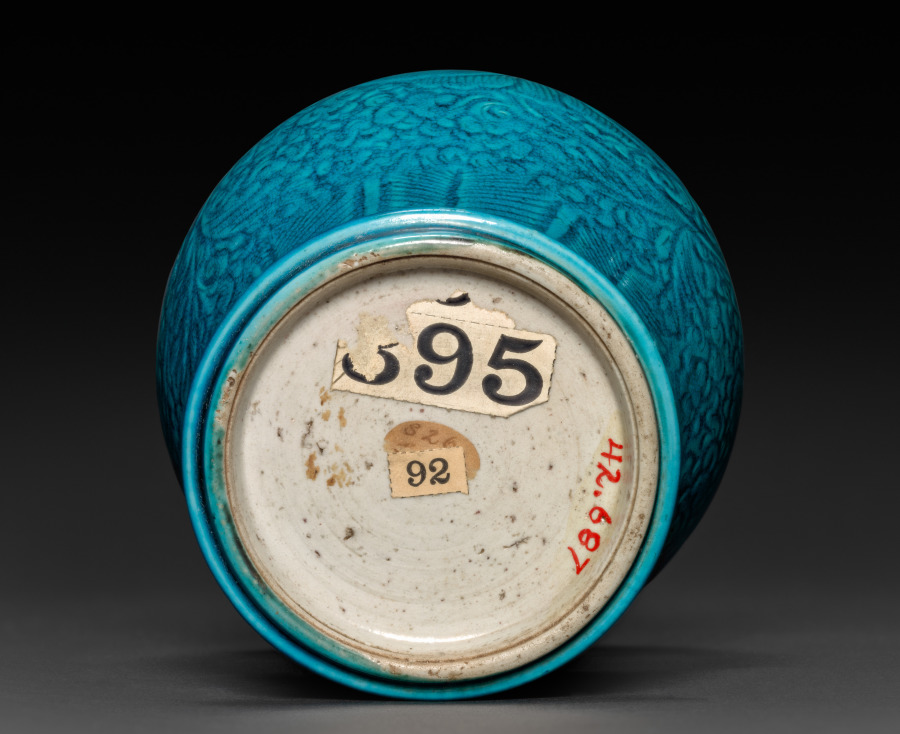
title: Vase with peacock blue glaze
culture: China, Qing dynasty (1644-1911), Kangxi reign (1661-1722)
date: 1662–1722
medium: porcelain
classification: Ceramic